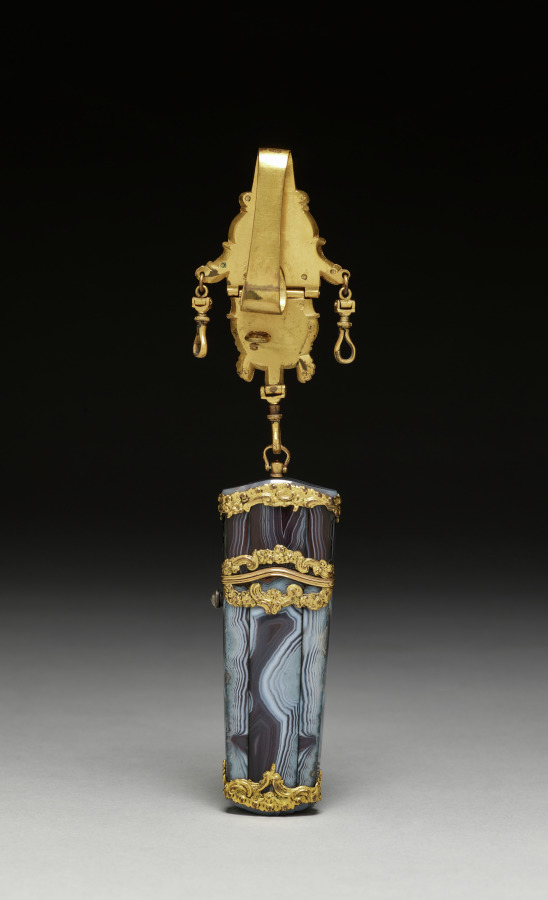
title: Chatelaine and Case (Étui)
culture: England, 18th century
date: c. 1770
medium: gray agate mounted in gilt metal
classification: Miscellaneous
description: Luxurious personal objects were an essential part of a privileged wardrobe during the 1700s and early 1800s, emphasizing their owner’s refinement and wealth. Especially popular were étuis, small ornamented cases containing miniature sewing, writing, or grooming implements that hung at a woman’s waist from an ornate clasp, known as a chatelaine. Despite its glittering surface, this small expensive set disguised a system based on the labor and suffering of enslaved or indentured people, whether in gold and stone mines or the shop where it was made.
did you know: Stored inside this case are grooming and writing instruments such as a clasp knife, scissors, an ivory tablet, a pencil, a threading needle used for lacing corsets, and an ear scoop.